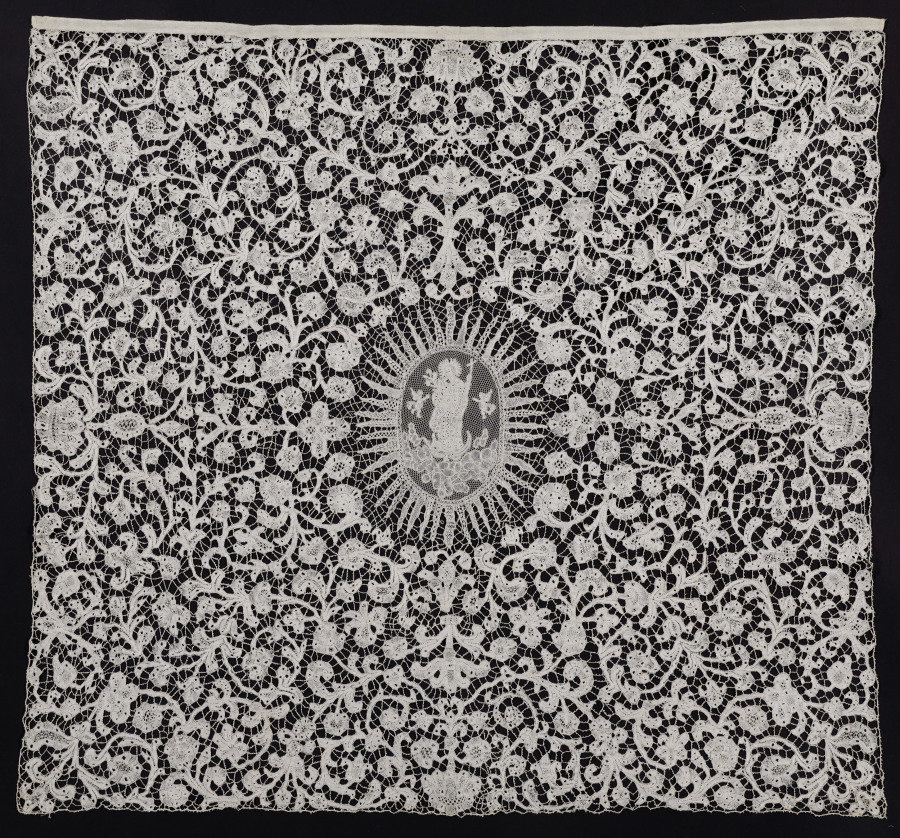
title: Lace Benediction Veil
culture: Flanders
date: 1600s–1700s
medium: Bobbin lace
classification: Lace